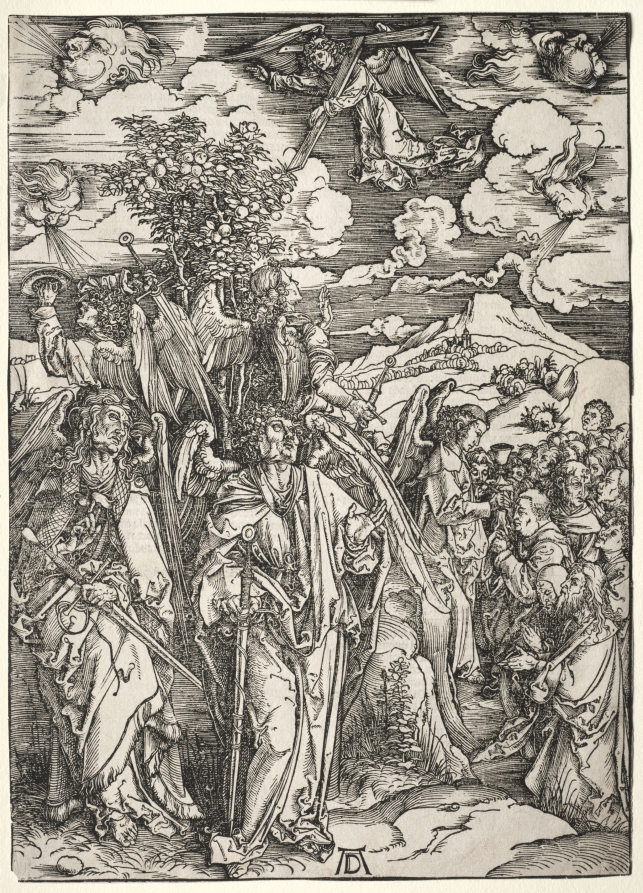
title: Revelation of St. John: Four Angels Holding up the Winds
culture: Germany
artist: Albrecht Dürer (German, 1471–1528)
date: 1511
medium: woodcut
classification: Print